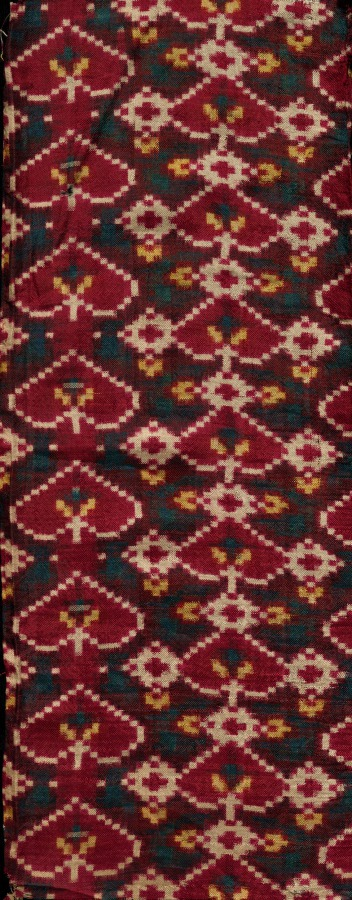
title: Fragment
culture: India, Gujarat, 19th century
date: 1800s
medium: patola (double ikat) weaving; silk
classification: Textile